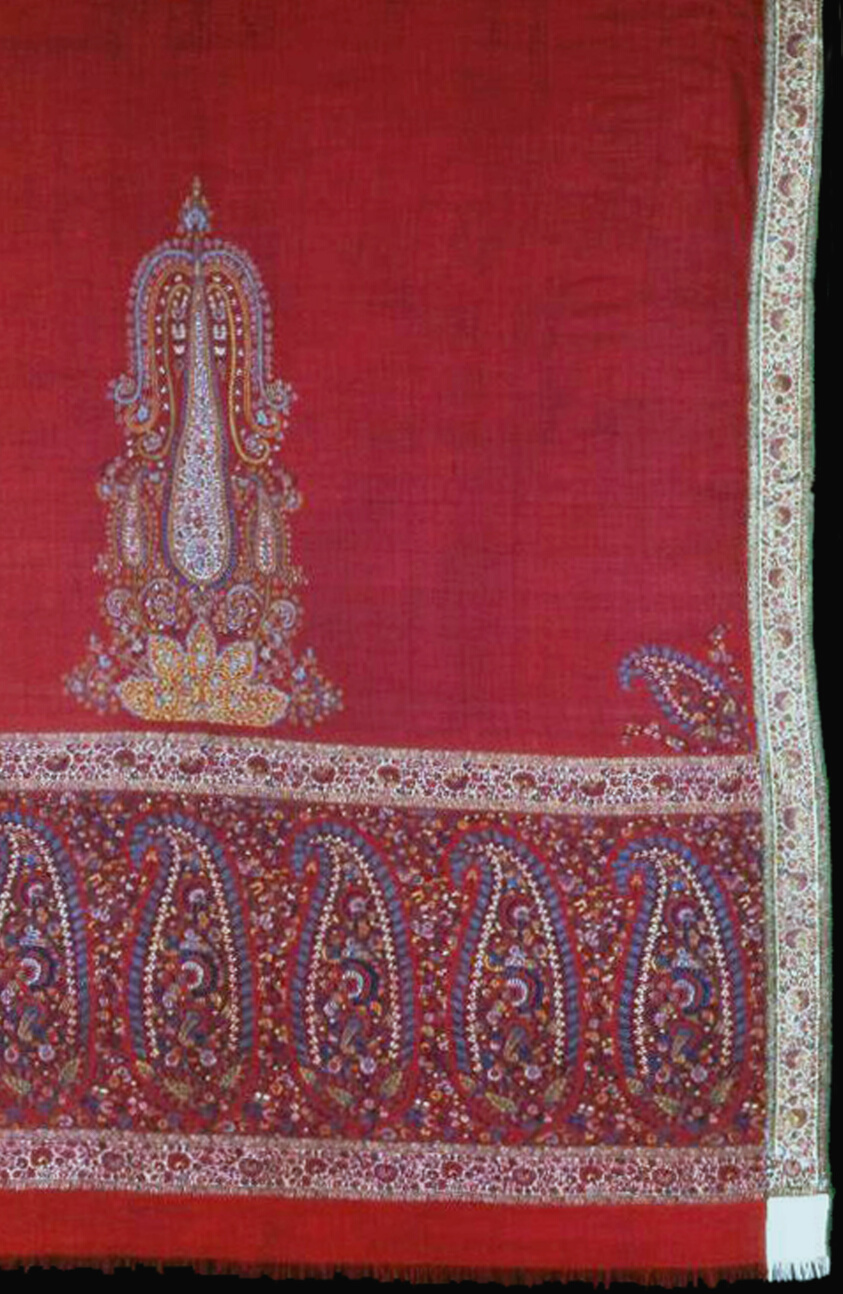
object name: Textile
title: Long Shawl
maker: India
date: 1825/35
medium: Wool, pieced double interlocking twill tapestry weave; embroidered in flat, overcast, running, and stem stitches; laid work and couching; ends of pieced warp chevron twill and twill weaves; main warp fringe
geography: India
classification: textile; needlework (visual works); weaving